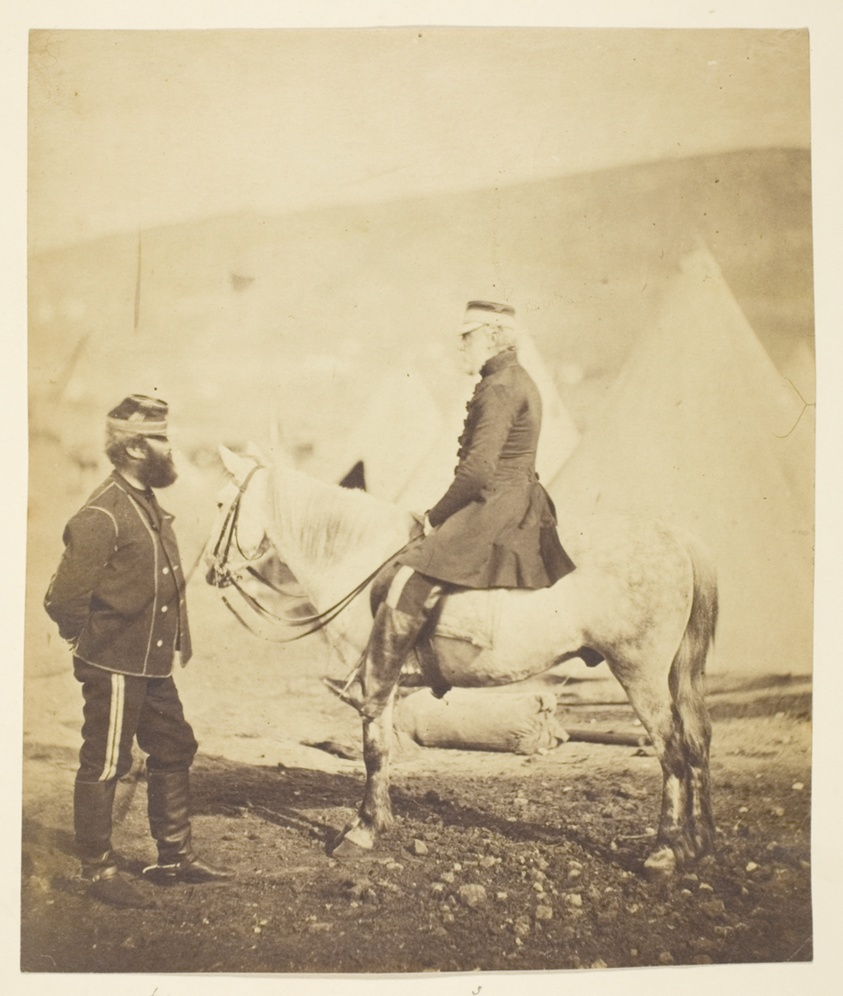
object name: Photograph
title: Sir Jas. York Scarlett (1799-1880), General, led Charge of Heavy Brigade, Balaclava (left); Edward Wm. Lowe (1820-1880), General (right); Taken at the Crimea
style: 19th century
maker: Roger Fenton (English, 1819–1869)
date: 1855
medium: Thinly albumenized print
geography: England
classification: albumen silver print; photographic process; photography; photograph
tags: Collected by Hugh Edwards